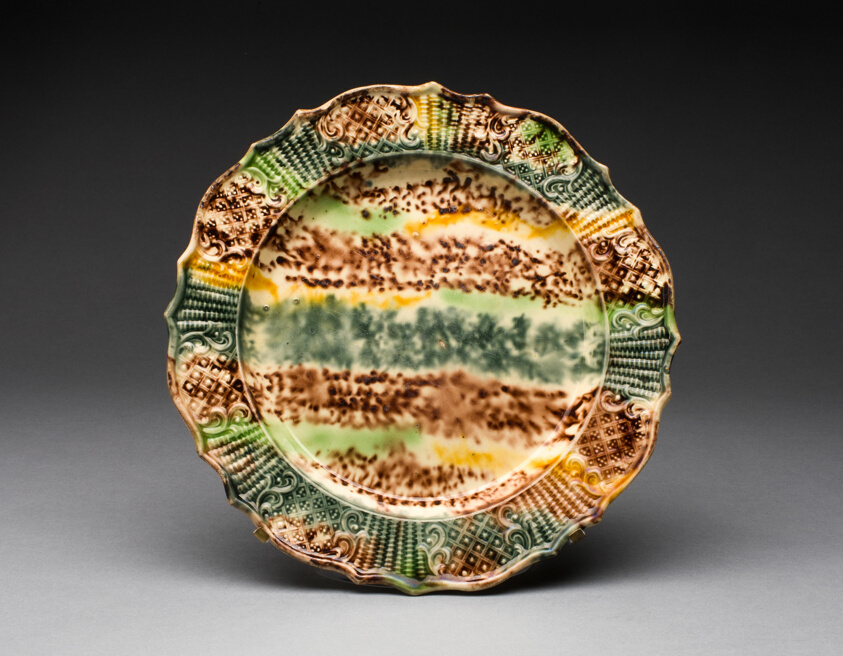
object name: Ceramics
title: Plate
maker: England, Staffordshire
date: 1760/70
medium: Lead-glazed earthenware (creamware)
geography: Staffordshire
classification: plate (general, dish); dish (vessel); ceramics; european decorative arts; creamware; earthenware; lead-glazed earthenware